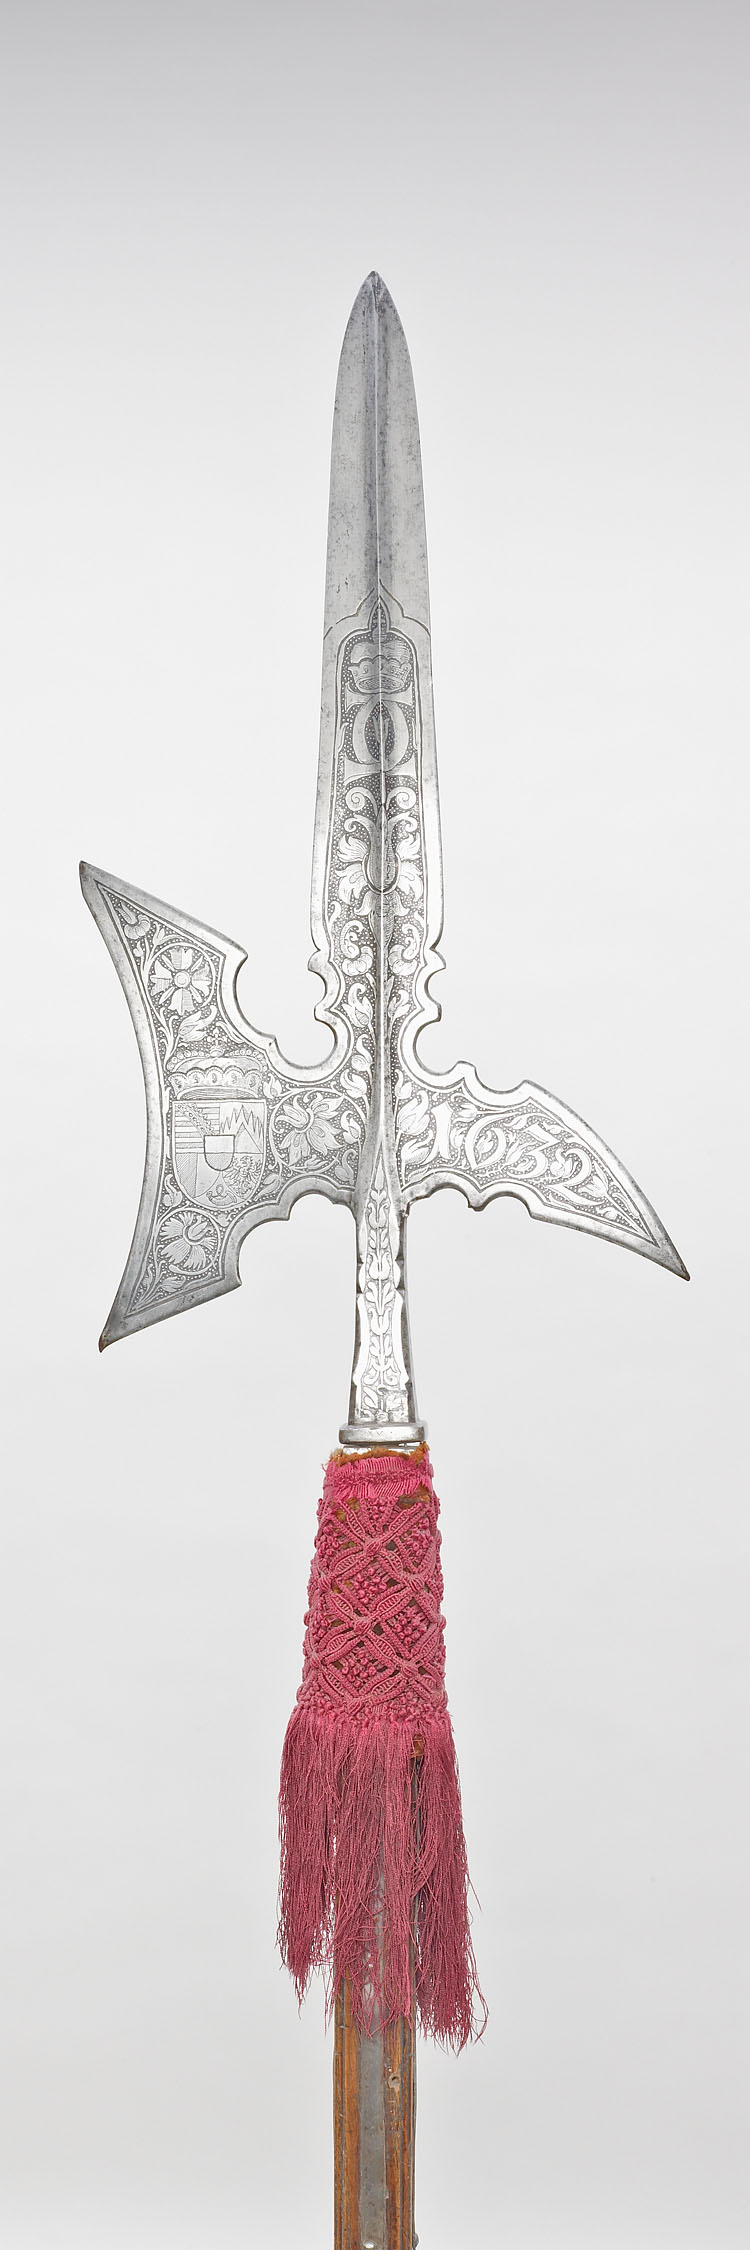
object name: Arms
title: Halberd for the Bodyguard of Karl Eusebius, Prince of Liechtenstein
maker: German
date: 1632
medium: Steel, iron, gilding, wood (ash), silk, and silk textile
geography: Southern Germany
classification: edged weapon-staff; arms; arms and armor